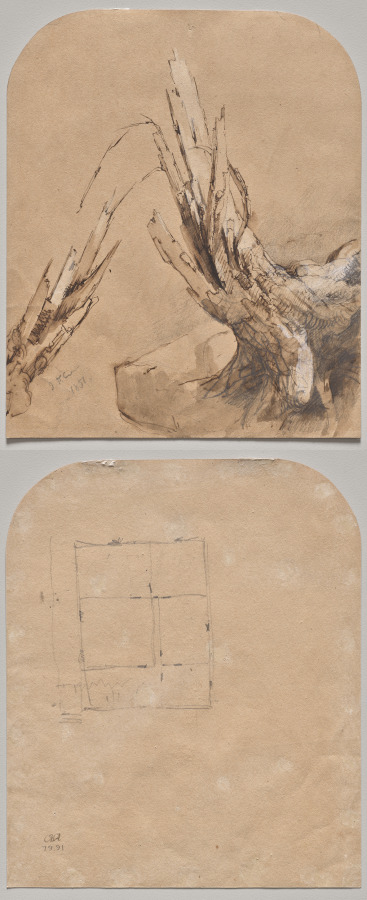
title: A Blasted Tree (recto) Floorplan (verso)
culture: America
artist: Jasper F. Cropsey (American, 1823–1900)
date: 1851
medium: pen and brown ink, brown wash and graphite, heightened with white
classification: Drawing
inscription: signed, lower left, in graphite: J. F. C. / 1851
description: This detailed drawing of a blasted tree was a study for Cropsey’s painting The Cove--A Storm Scene in the Catskill Mountains (1851).